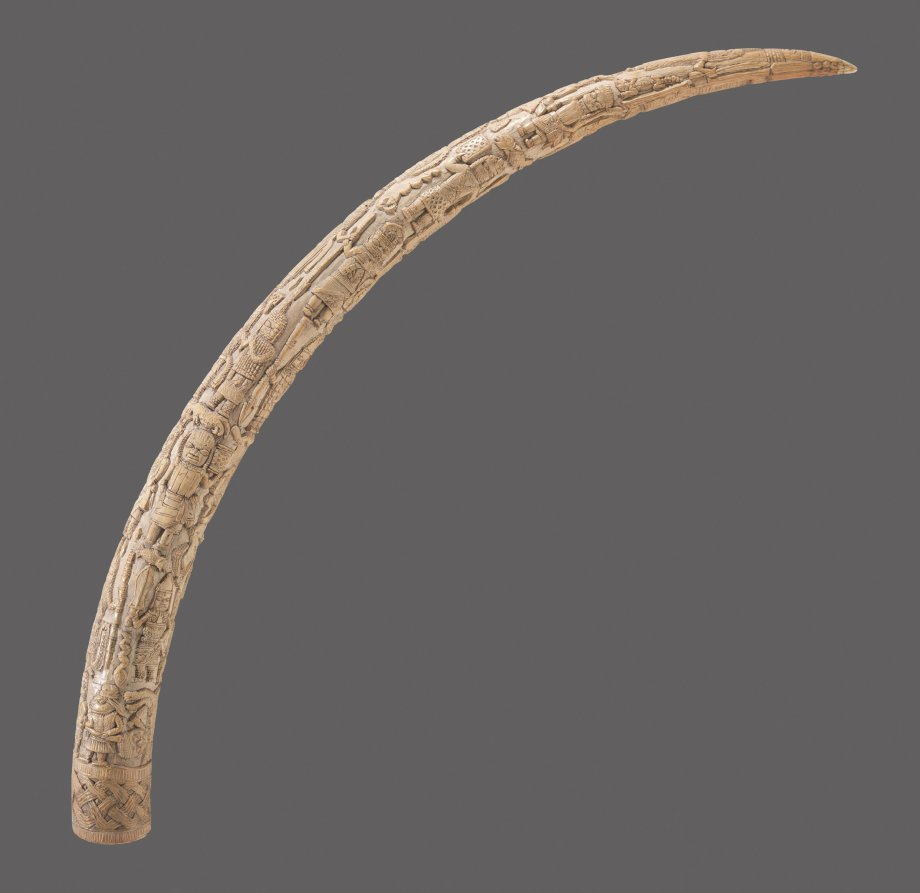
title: Ancestral Altar Tusk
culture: Nigeria, Benin Kingdom, Ẹdo peoples, members of the Igbesanmwan (wood and ivory carvers) guild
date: c. 1820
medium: Elephant ivory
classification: Sculpture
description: Ọba Ọsẹmwẹdẹ commissioned the carving of this tusk to connect with his ancestors and symbolize his strength. It is covered with royal figures wearing elaborate regalia and scenes of power, ritual, and violence. While Benin royal symbols may look similar across centuries, their meanings can shift. Ọsẹmwẹdẹ’s reign was prosperous due to trade with the Dutch; however, 16th-century Portuguese men are carved on the lower tusk. By the 1800s they represented any European traders. This tusk’s surface likely became worn and cracked from frequent washing, bleaching, and the applying of a white clay (orhue) linked to peace, purity, and prosperity.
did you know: Originally, this carved tusk was placed on an ancestral altar as part of an ensemble of objects made to memorialize a deceased Ọba (ruler).